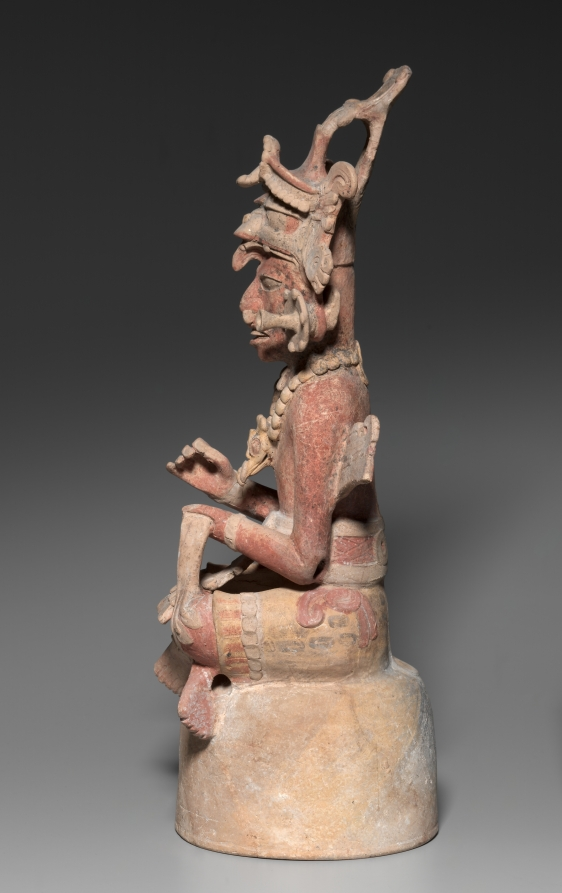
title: Artisan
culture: Guatemala, Petén region, Maya style (250-900), Maya style (250-900)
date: 250–600 CE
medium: earthenware with colored slips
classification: Sculpture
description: These figures represent the supernatural patrons of the visual arts and writing: the brothers Hun Batz and Hun Chuen ("One Monkey" and "One Artisan"). The two were refined artists but also bullies who tormented their younger brothers, who took revenge by transforming their elders into monkeys. Many Maya representations of the painter-scribes immortalize this fate by depicting the pair with both simian and human features, as here. The brothers are shown engaged in artistic or scribal pursuits. Sitting on high-domed bases that may have served as the lids of incense or offering bowls, each apparently once grasped a tool in his upper hand—for instance, a paint brush or a stylus for writing. In the lower hand, one cradles a small mask and the other, a piece of bark that likely refers to the beaten bark from which the Maya made books.